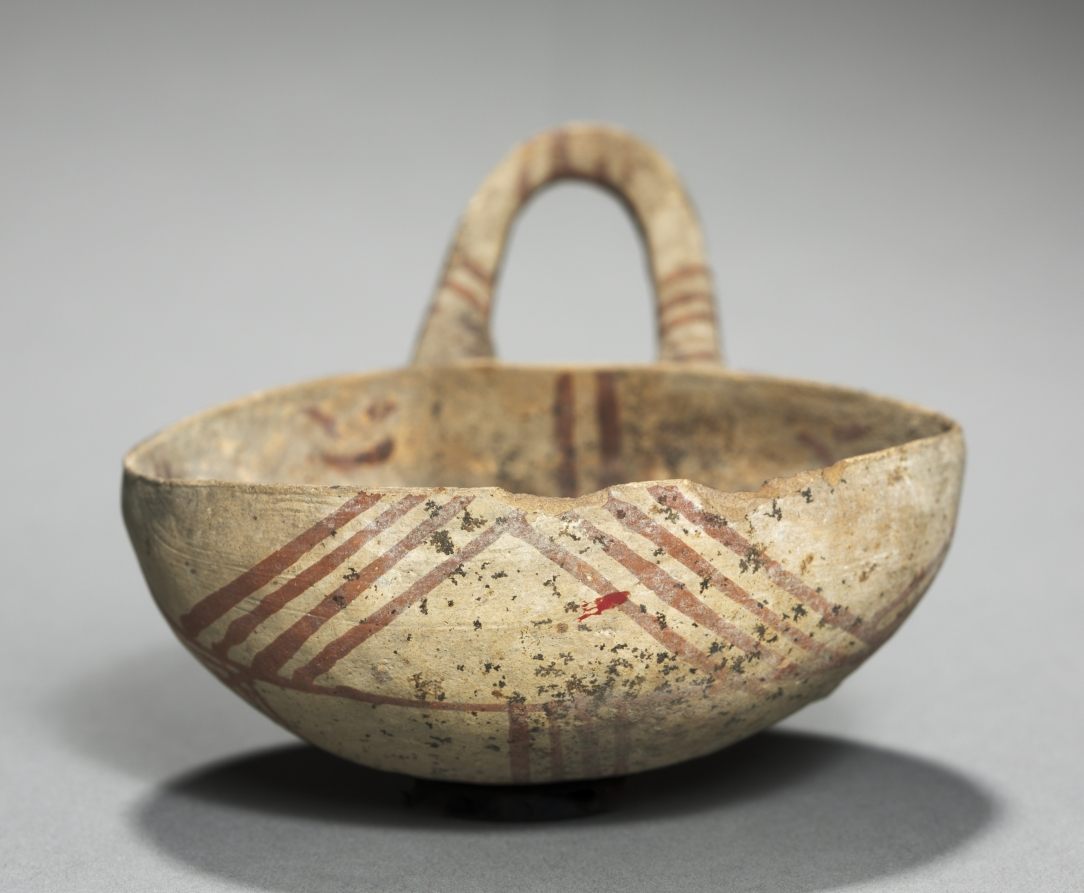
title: One-Handled Bowl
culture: Cyprus, middle Cypriot III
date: c. 1725–1600 BCE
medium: white painted ware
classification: Ceramic